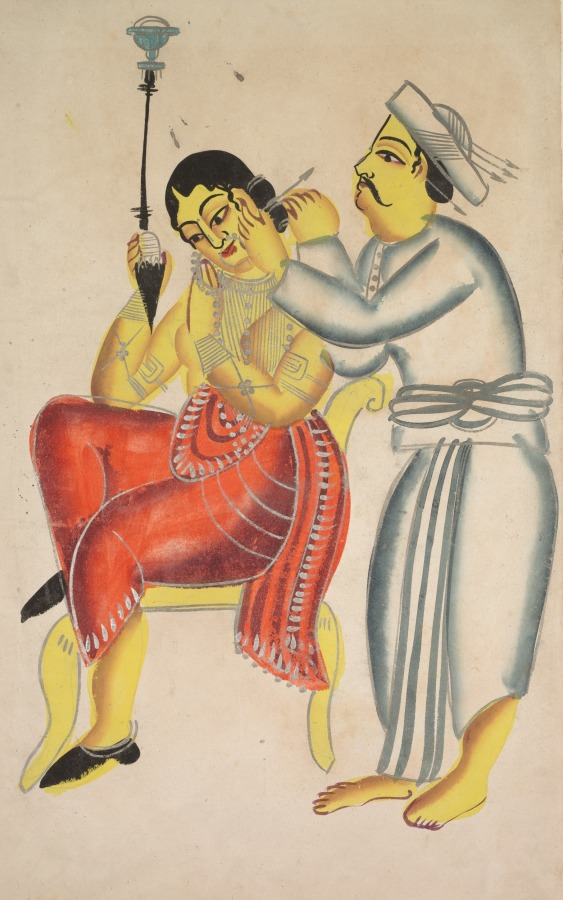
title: Barber Cleaning a Woman’s Ear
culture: Eastern India, Bengal, Kolkata, Kalighat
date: c. 1890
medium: Gum tempera, graphite, ink, and tin on paper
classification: Painting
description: Kalighat paintings reflect the time and context in which they were created. Kalighat painters used their medium to offer penetrating and insightful critiques of British-influenced Indians as well as the British themselves through satires and caricatures. Newly rich Bengali native Indian clerks (babus) aspired to dress and behave like their British masters, and Kalighat painters taunted them for this. A chinless barber with cleaning pins tucked in his turban is cleaning the ears of a lady customer. A fashionable woman, she smokes a hookah and exposes one breast to her flirtatious barber. As the Bengali babus spent time with their mistresses and courtesans, neglected wives and concubines were portrayed as relying on the company of their servants.